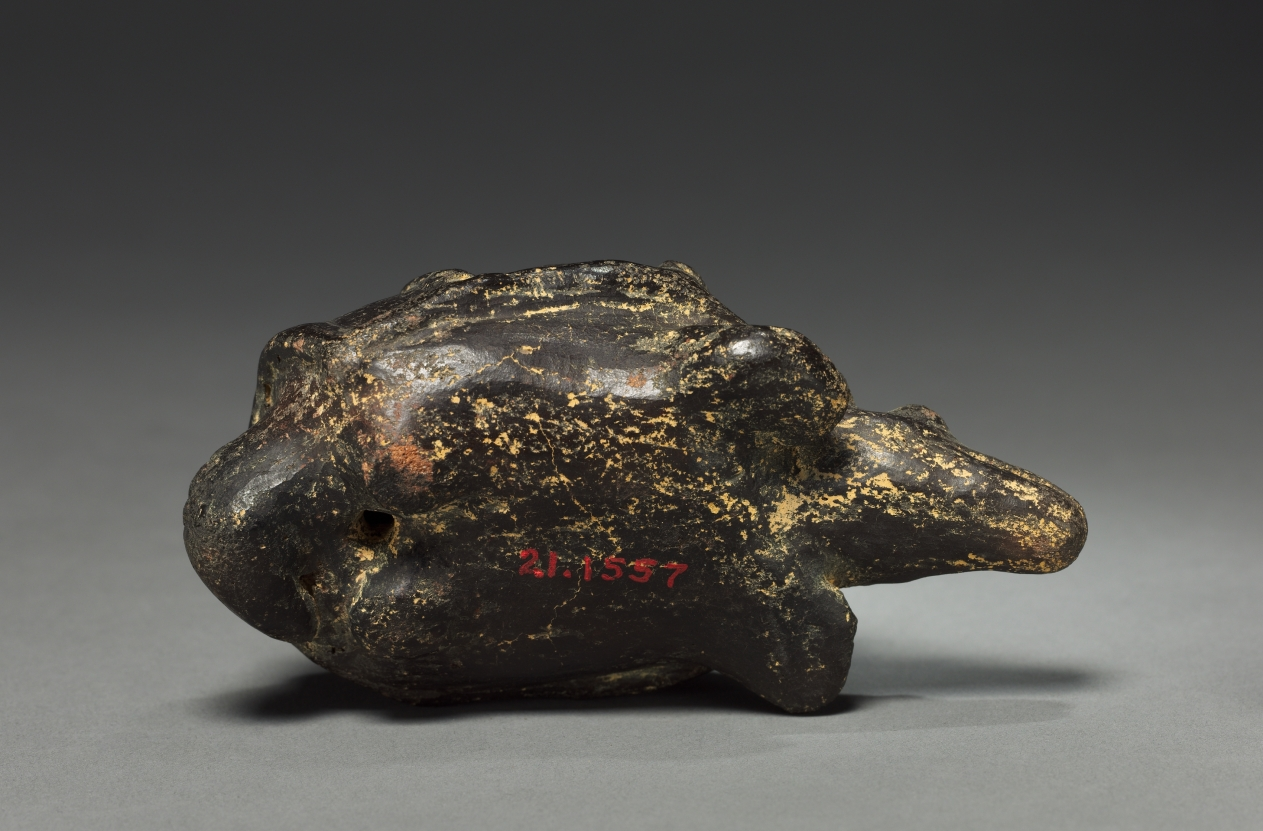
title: Armadillo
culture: Colombia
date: before 1921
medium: pottery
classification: Ceramic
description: Rattles that combine ravens, humans, and frogs are among the best known but least understood of the Northwest Coast object types. They clearly have mythic import and may have originated as shamans’ implements. But historically chiefs used them during secular parts of winter dances.